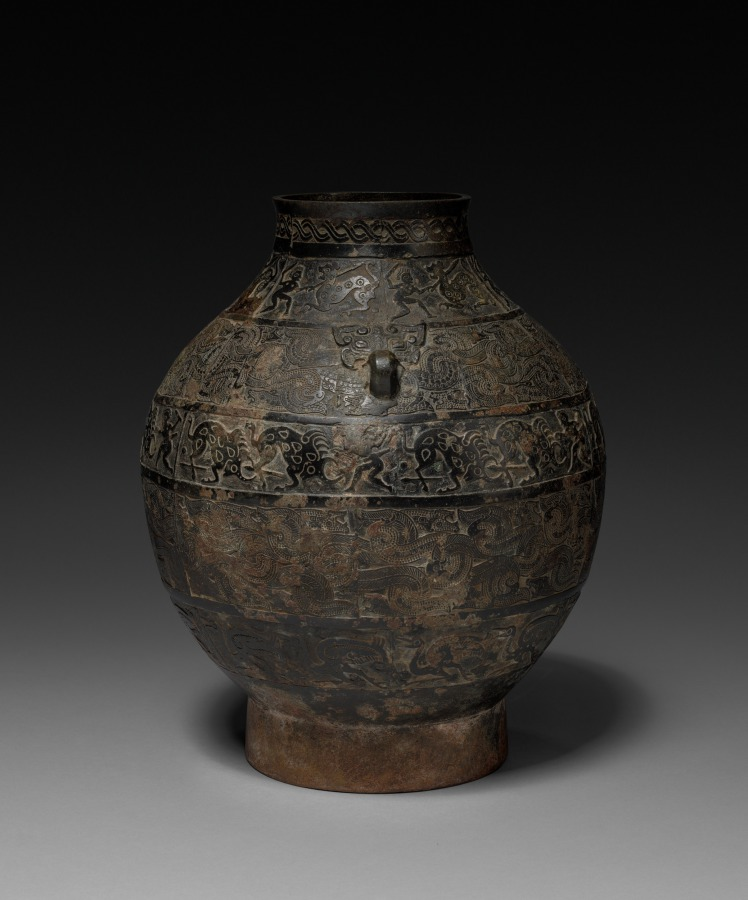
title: Hu (Jar)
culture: China, Eastern Zhou dynasty (770–256 BCE), Warring States period (475–221 BCE)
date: 481–221 BCE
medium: bronze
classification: Metalwork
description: The hunting scenes in flat, low relief on this vessel are among the earliest pictorial scenes in Chinese art, dating from the beginning of the Late Zhou period (481–221 BC). There are six horizontal bands of low relief designs across the body of the vessel. Each is composed of repeating motifs. The short slightly flaring neck has a narrow band of plait pattern, below which is a vivid hunting scene. The hunter holding a long spear and a sword faces off with a feline covered in circle patterns. The main body of the vessel is decorated with two wide bands of interlacing dragons, separated by a band with another hunting scene. This hunter faces two horned beasts whose rear leg has been pierced by a spear. The repeating pattern in the lowest band features two long-legged birds and a small fish.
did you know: On the vessel’s shoulders are applied taotie masks from which stem vertical loops for holding the vessel possibly with a rope.